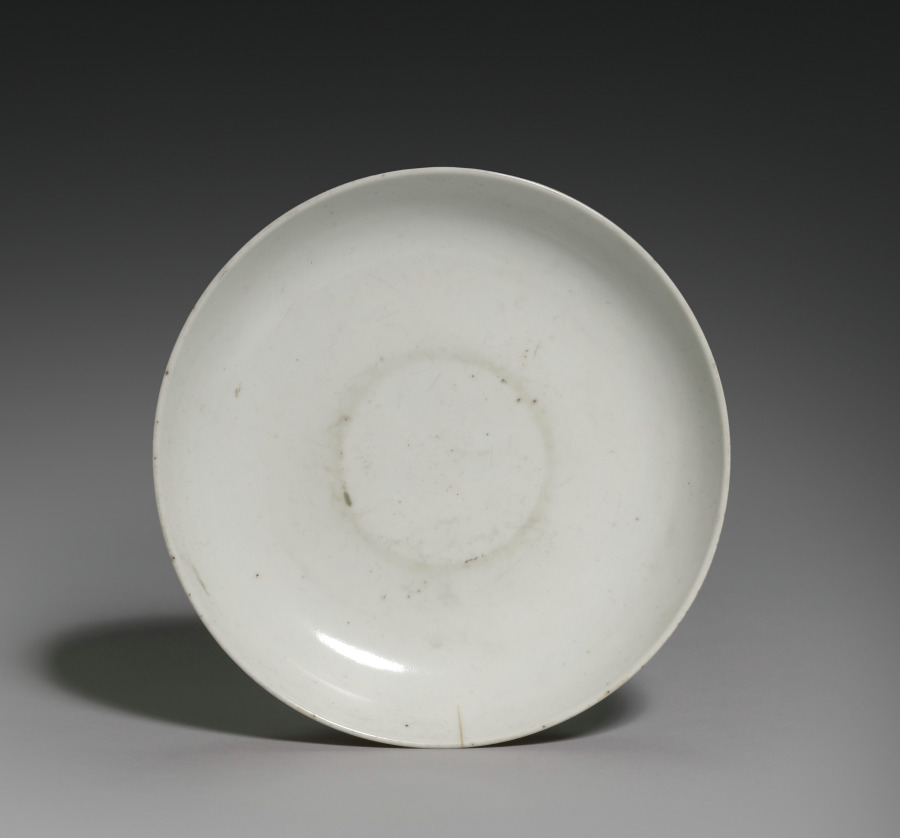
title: Chow Bowl (lid)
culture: Siam, 18th century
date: 1700s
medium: porcelain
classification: Metalwork